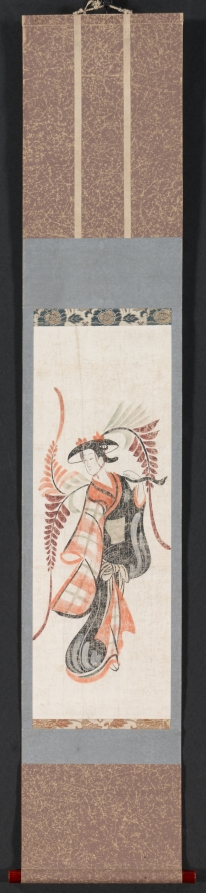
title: Wisteria Maiden (Fuji Musume)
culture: Japan, Edo period (1615–1868)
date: 1615–99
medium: hanging scroll; ink and color on paper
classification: Painting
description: The wisteria maiden is an otsu-e subject thought to have been inspired by popular dances. Paintings such as this were often sold as good-luck charms for marriages.